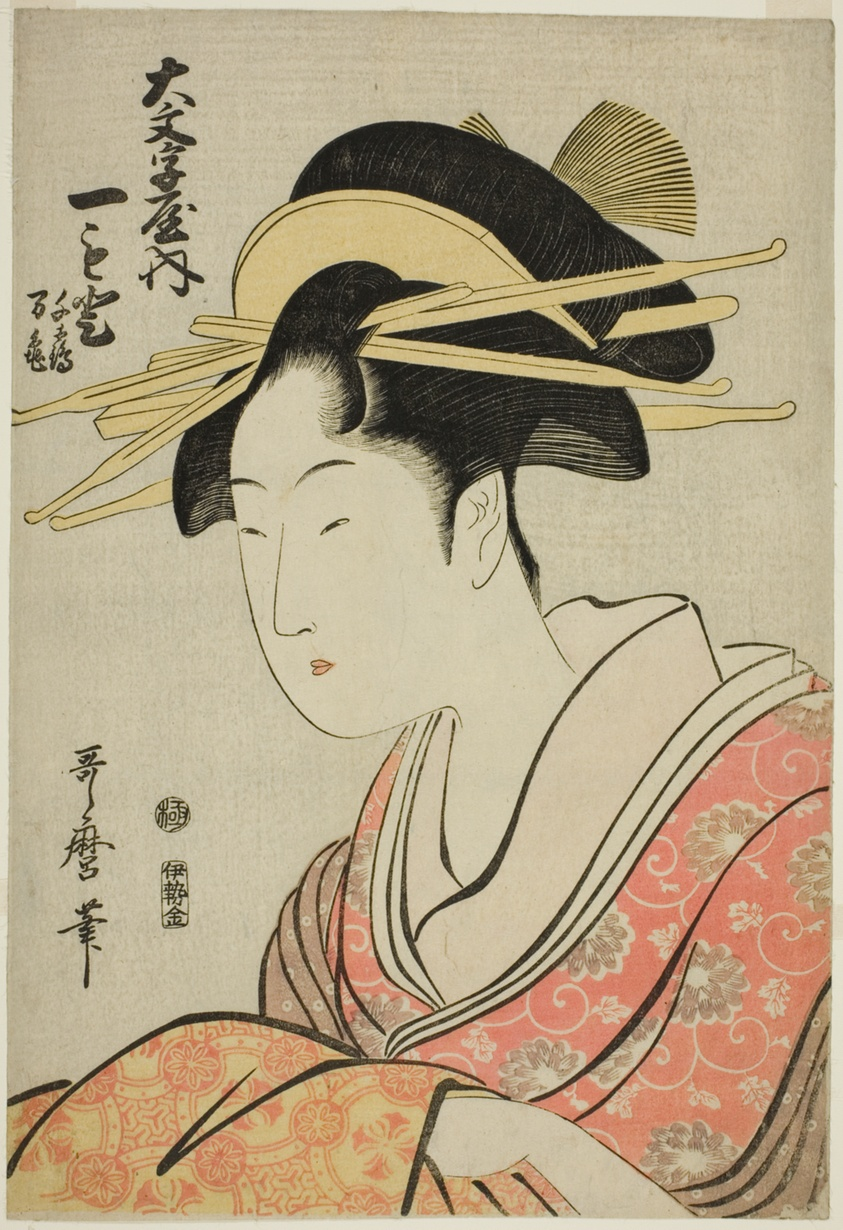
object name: Print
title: Hitomoto of the Daimonjiya with Attendants Senkaku and Banki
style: Japanese (culture or style)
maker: Kitagawa Utamaro 喜多川 歌麿; Japanese, 1753 (?)-1806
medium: Color woodblock print; oban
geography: Japan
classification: woodblock print; print; asian art